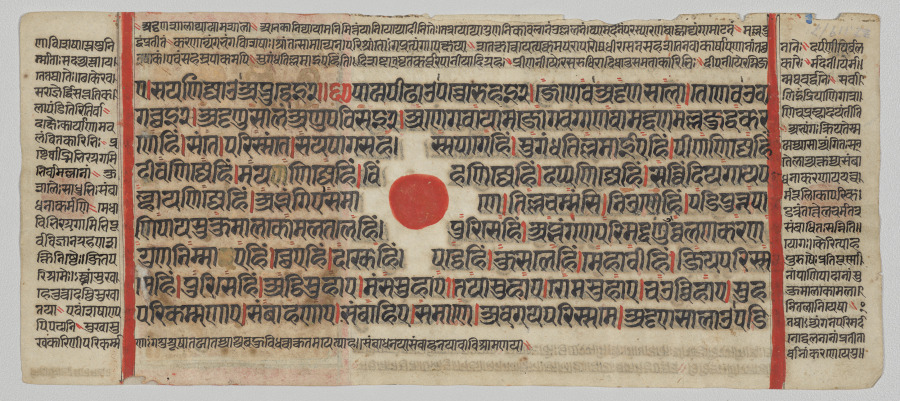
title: Text, Folio 22 (recto), from a Kalpa-sutra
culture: Western India, Gujarat, last quarter of the 15th century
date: c. 1475–1500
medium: Gum tempera, ink, and gold on paper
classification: Painting